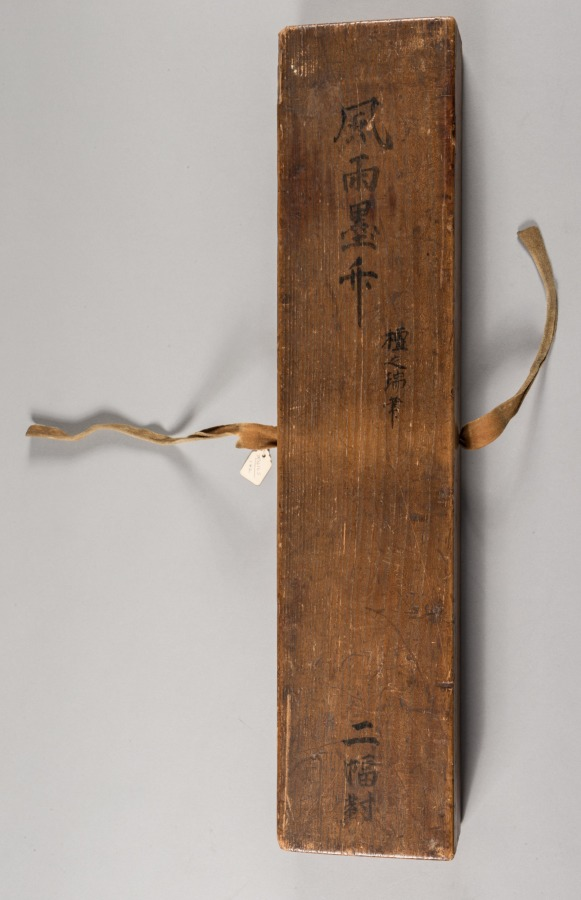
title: Bamboo in Rain; Bamboo in Wind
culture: Japan, Muromachi period (1392–1573)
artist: Genga (Japanese)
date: early 1500s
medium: hanging scroll; ink on silk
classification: Painting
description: East Asian paintings from China, Korea, and Japan were frequently conceived as sets of multiple images. These sets might have been composed for specific palace or temple rooms, or to portray a specific theme, such as the four seasons. Over time, the original intent of such sets is often lost through damage, changes in ownership, or a variety of other reasons. The identity of the artist can also be lost, but then, sometimes, retrieved. This pair of ink paintings has traditionally been labeled as Japanese and attributed to the 16th-century painter Genga. Since there are no seals or signature of the artist on the painting, this attribution was based on comparisons of brush style with paintings known to be by Genga. More recent study indicates that while the 16th century is an appropriate time frame for the pair, the precise cultural identity of the artist is not certain after all. The dark, eccentric shapes of the rocks and bamboo clusters and the dramatic tonal contrasts evident throughout the composition point to either Korean authorship or influence upon a Japanese painter of the period.